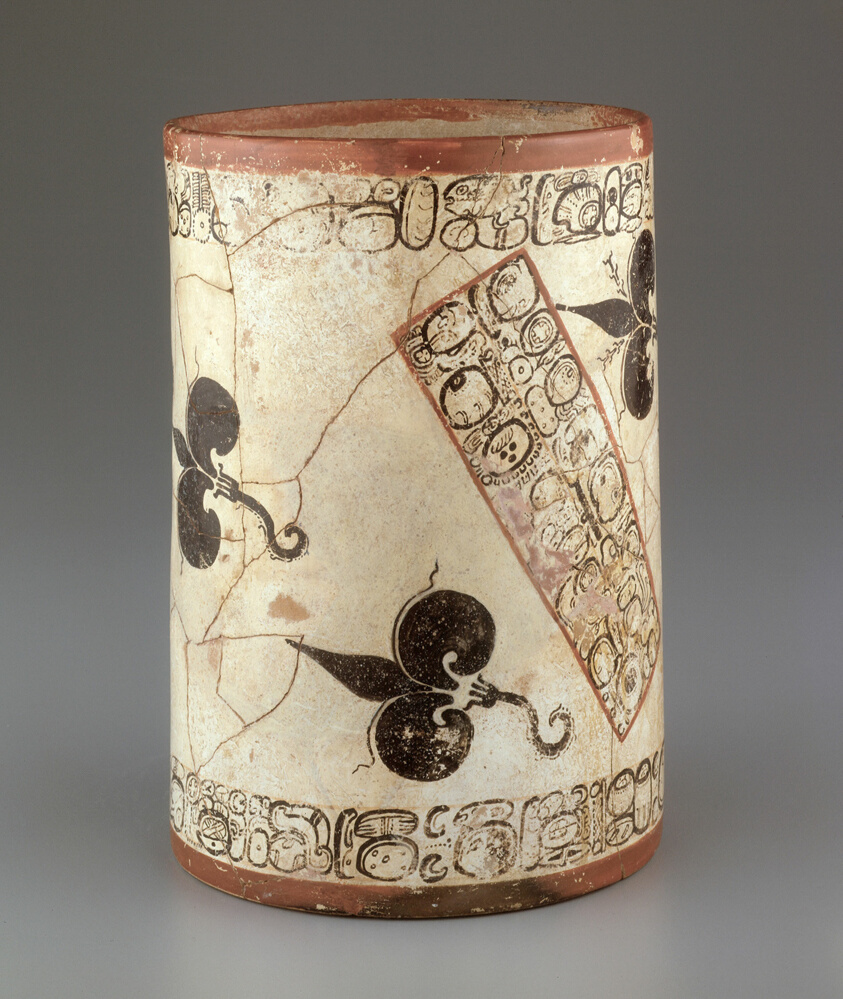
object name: Vessel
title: Water-Lily Vessel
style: maya, classic, mesoamerican, Pre-Columbian, americas, mayan, late classic, Arts of the Americas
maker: Ah Maxam; Maya, active mid-/late 8th century; Vicinity of Naranjo, Petén region, Guatemala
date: 750–800 CE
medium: Ceramic and pigment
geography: Petén department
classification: ceramics; earthenware; vessel; art of the americas; vessel for serving drinks; inscription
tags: waterlilly, artists, flowers, geneology, parents, underworld, underwater